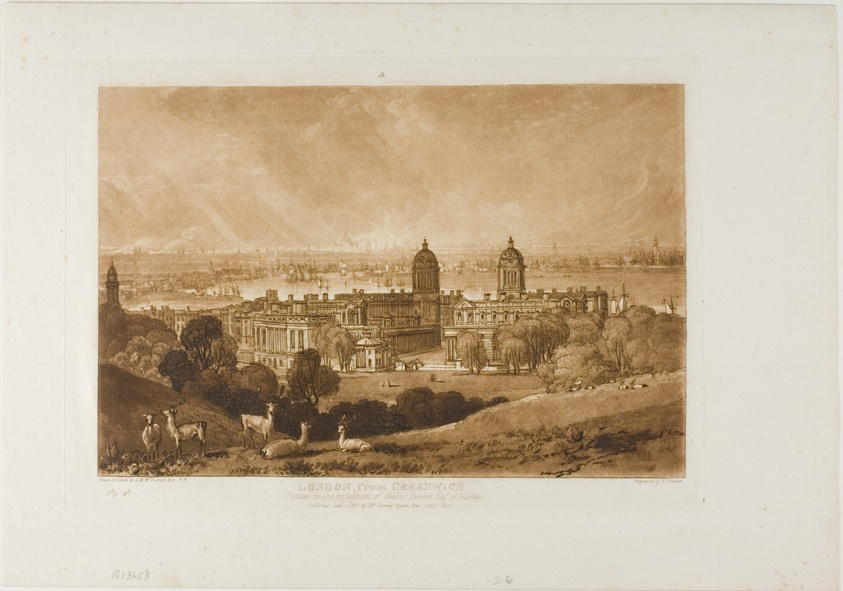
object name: Print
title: London from Greenwich, plate 26 from Liber Studiorum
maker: Joseph Mallord William Turner (English, 1775-1851); Engraved by Charles Turner (english 1773-1857)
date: published January 1, 1811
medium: Etching and engraving in brown on ivory wove paper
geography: England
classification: etching; print; prints and drawing